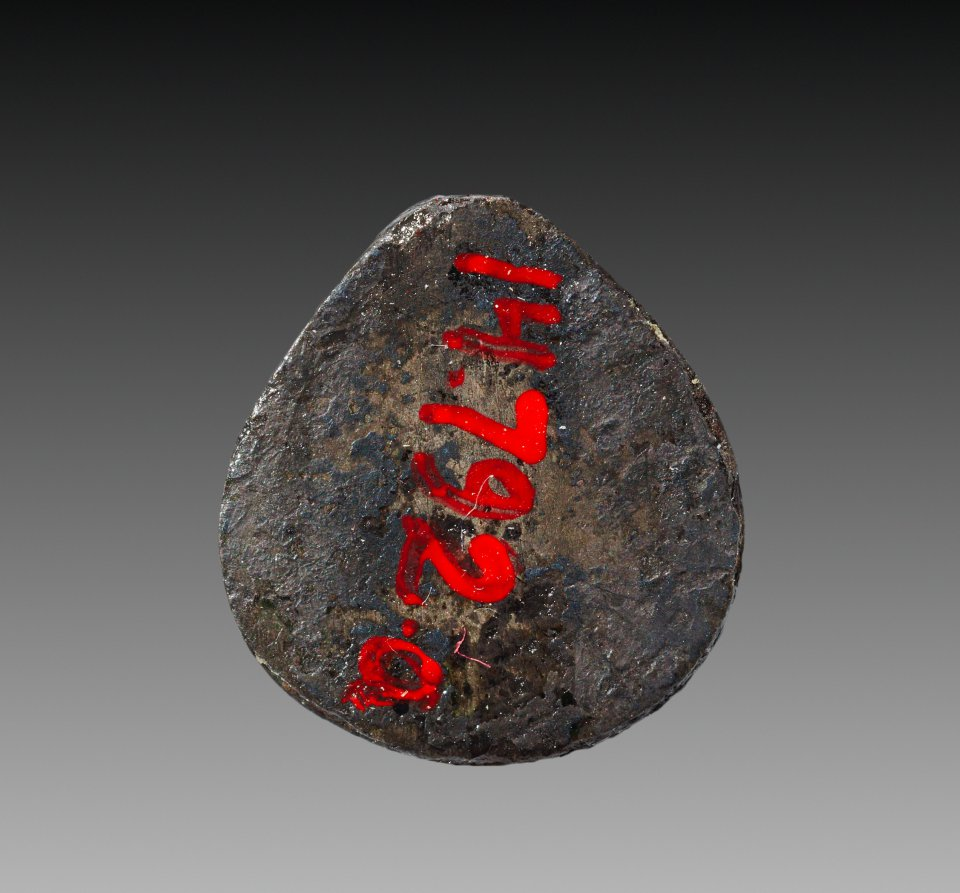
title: Oyster-Shell Pendant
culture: Egypt, Middle Kingdom (2040–1648 BCE), Dynasty 12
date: 1980–1801 BCE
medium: carnelian and silver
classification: Jewelry